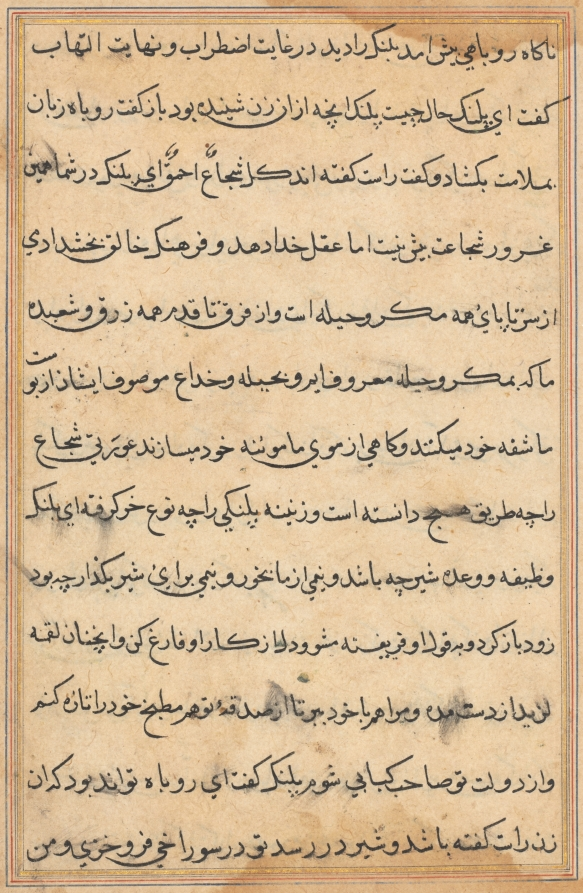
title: Page from Tales of a Parrot (Tuti-nama): text page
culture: Mughal India, court of Akbar (reigned 1556–1605)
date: c. 1560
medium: gum tempera, ink, and gold on paper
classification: Painting